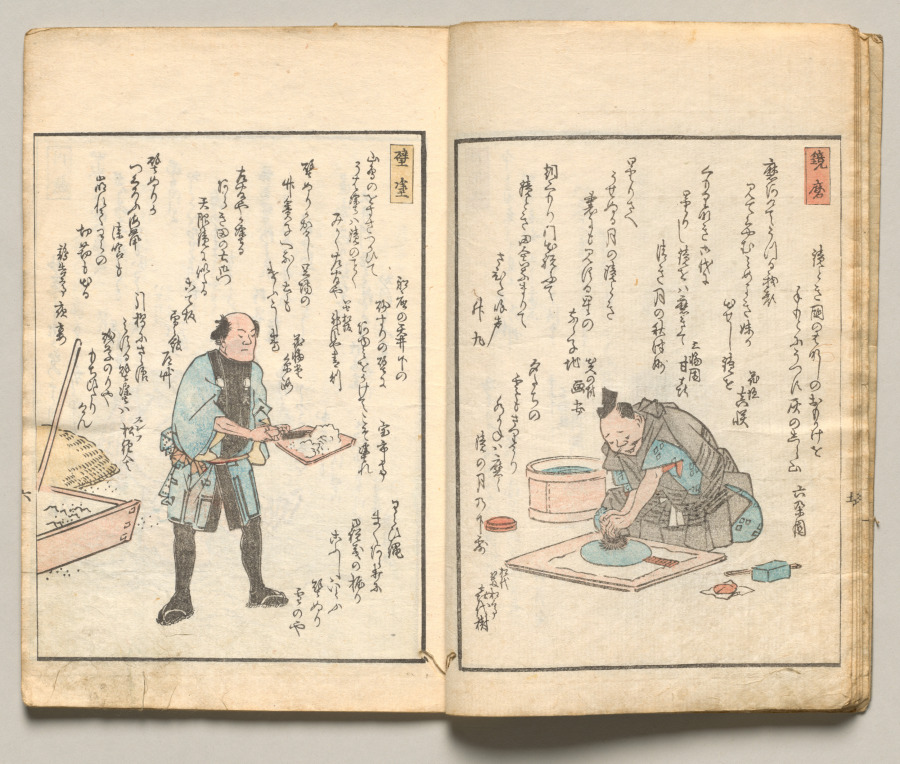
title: Spread Six from Volume Seven of People of Japan in Light Verse (Kyōka)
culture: Japan, Edo period (1615–1868)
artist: Utagawa Hiroshige (Japanese, 1797–1858)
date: 1857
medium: Woodblock-printed book; ink and color on paper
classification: Bound Volume